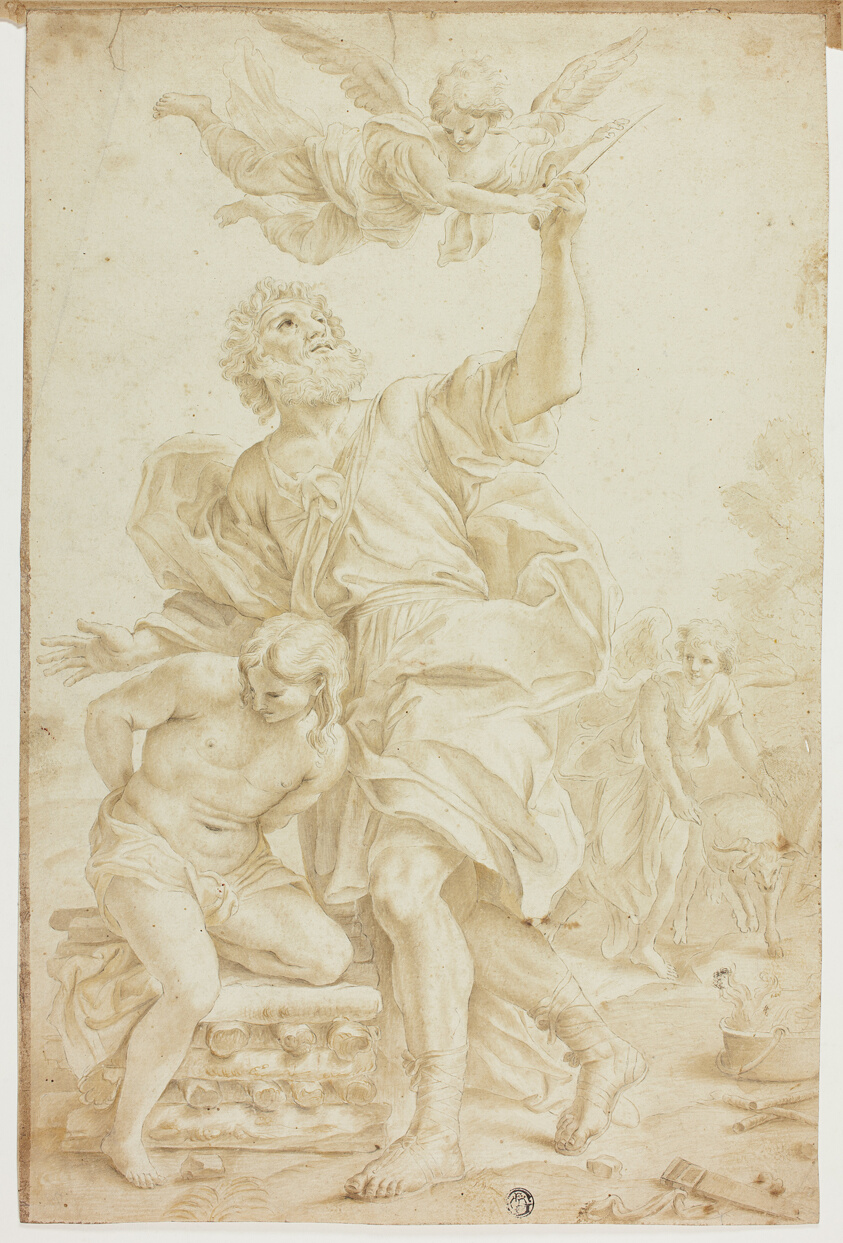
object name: Drawing and Watercolor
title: Sacrifice of Isaac (recto); Figure Sketches (verso)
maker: After Domenico Piola; Italian, 1627-1703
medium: Pen and brown ink, with brush and brown wash, over black chalk (recto) and black chalk (verso) on ivory laid paper, tipped onto tan wove paper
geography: Italy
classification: drawings (visual works); prints and drawing